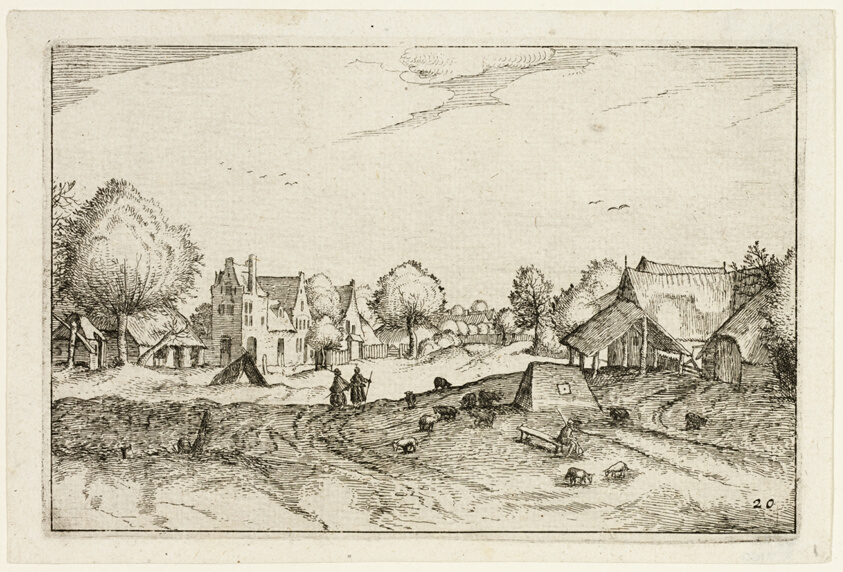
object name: Print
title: Village Road, plate twenty after Pictures of Farms, Country Houses and Rustic Villages (Praediorum villarum et rusticarum casularum icones)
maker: Claes Jansz. Visscher (Dutch, 1587-1652); after Unknown Flemish Artist, misidentified as Pieter Bruegel, the elder (Flemish, 1525/30-1569)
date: 1612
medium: Etching in black on ivory laid paper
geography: Netherlands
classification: etching; print; prints and drawing